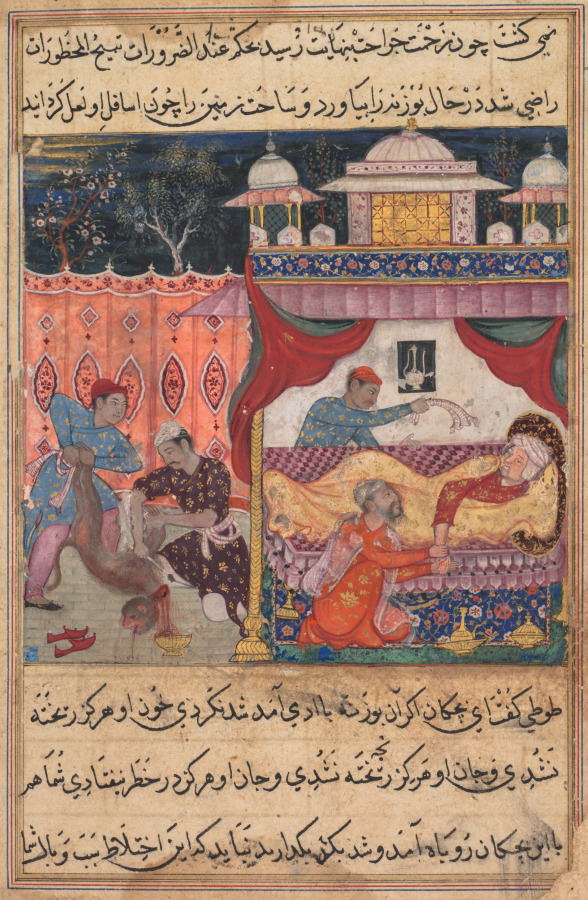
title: The monkey slain, his blood to be used as medicine for the ailing prince he has bitten, from a Tuti-nama (Tales of a Parrot): Fifth Night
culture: Mughal India, court of Akbar (reigned 1556–1605)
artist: Basawan​ (Indian, active mid-1500s)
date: c. 1560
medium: gum tempera, ink, and gold on paper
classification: Painting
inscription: 'amal basāwan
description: Wounded by the chess-playing monkey’s bite, the prince’s hand became increasingly infected. The only cure, his doctors said, was to apply the blood of the monkey to the wound and let it dry. Reluctantly, the prince allowed the monkey to be killed. Two men accomplish this serious work at the left. In the right margin is written the name of the artist, the celebrated Basavana. The Tuti-nama contains the earliest known paintings by the prolific master who was instrumental in shaping the Mughal painting style over subsequent decades.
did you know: Under the covers is the hand that got infected from the monkey bite.